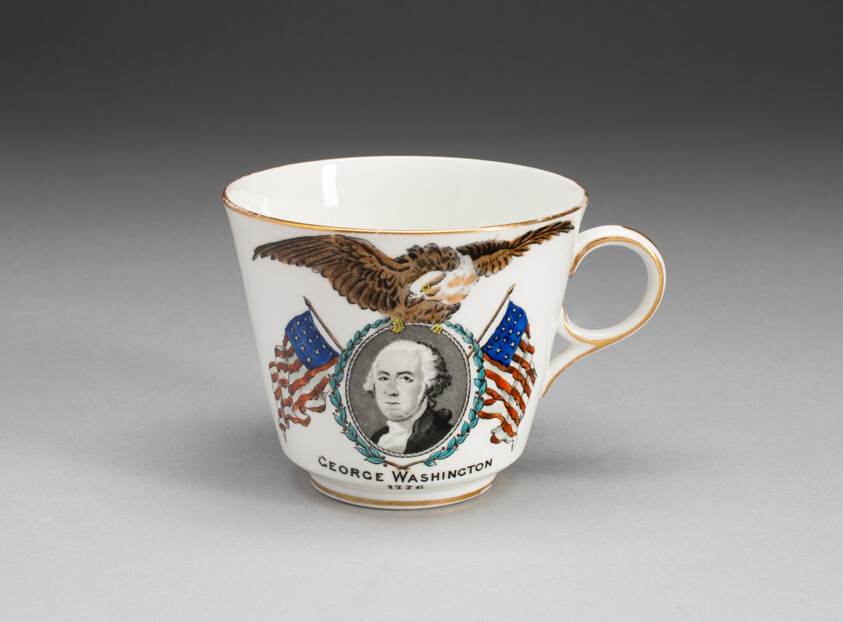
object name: Ceramics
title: Cup and Saucer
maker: Made by W.T. Copeland & Sons; Stoke, England, c. 1847–1970; Retailed by J.M. Shaw & Co.; American. c. 1870s; New York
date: 1876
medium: Porcelain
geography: New York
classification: drinking vessel; porcelain; american decorative arts; art of the americas; european decorative arts; ceramics; decorative arts